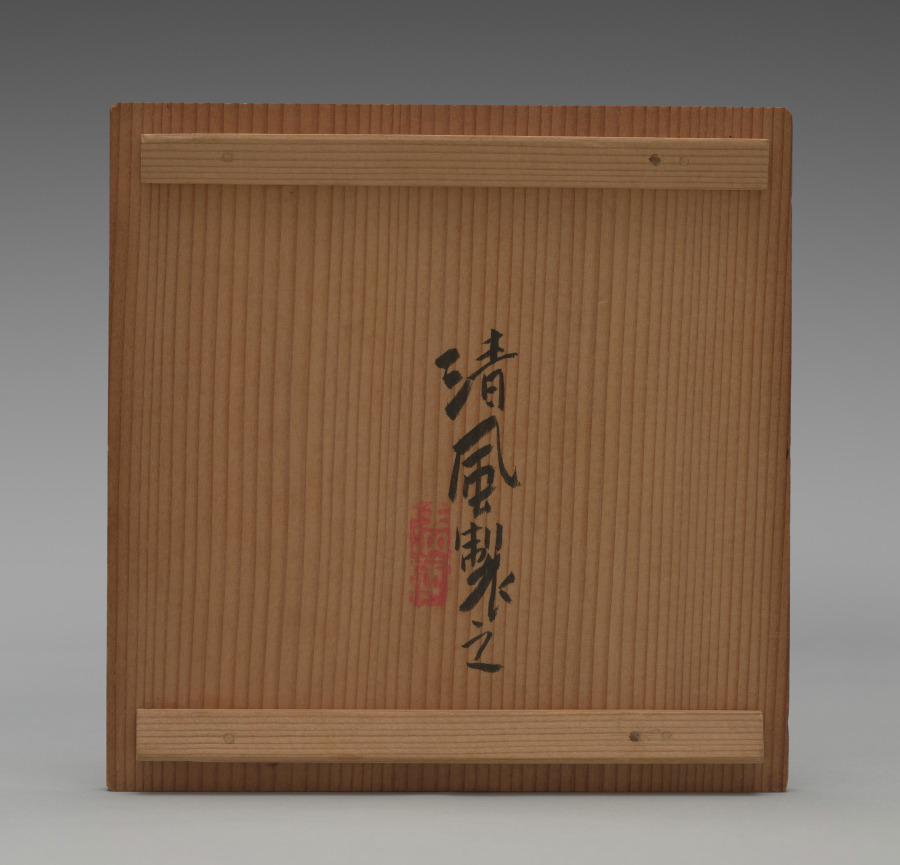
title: Teapot with Bamboo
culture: Japan, Taishō period (1912–26) or Shōwa period (1926–89)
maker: Seifū Yohei IV (Japanese, 1872–1951)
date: 1914–46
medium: Porcelain with underglaze blue, molded design and metal handles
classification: Ceramic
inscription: 清風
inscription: 清風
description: This teapot has a well-balanced design of bamboo in underglaze blue and nyoi staff-head motifs applied to both sides at the shoulder.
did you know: There is a seal on the base of the teapot.